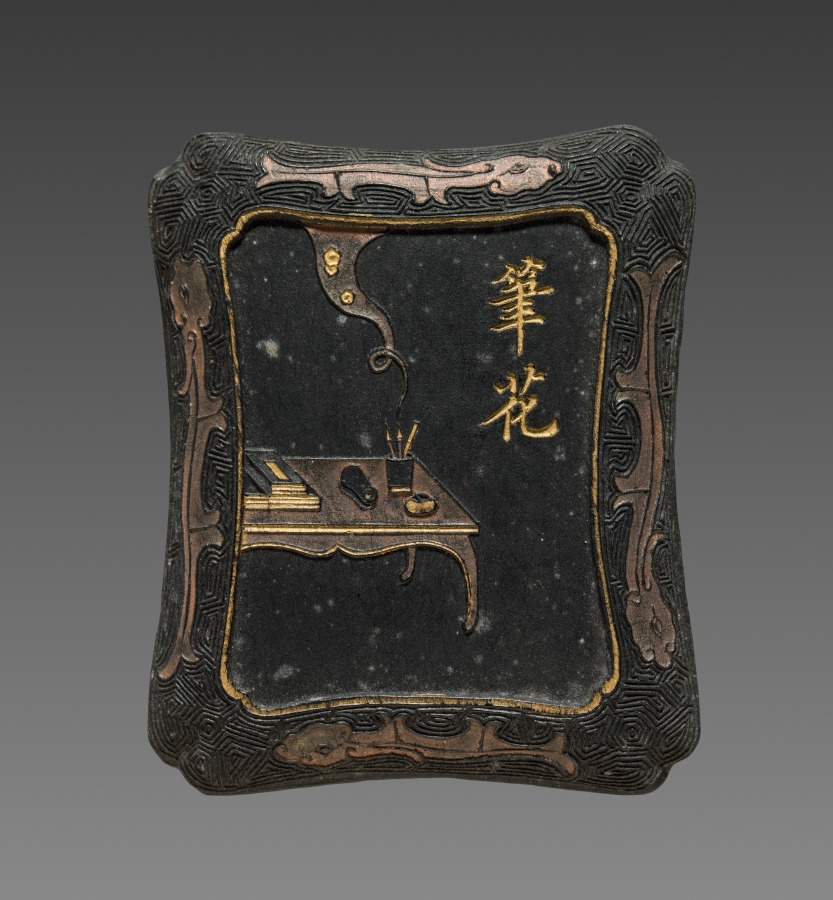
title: Ink Cake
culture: China, Qing dynasty (1644-1911)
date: 1800s-early 1900s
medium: ink cake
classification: Miscellaneous